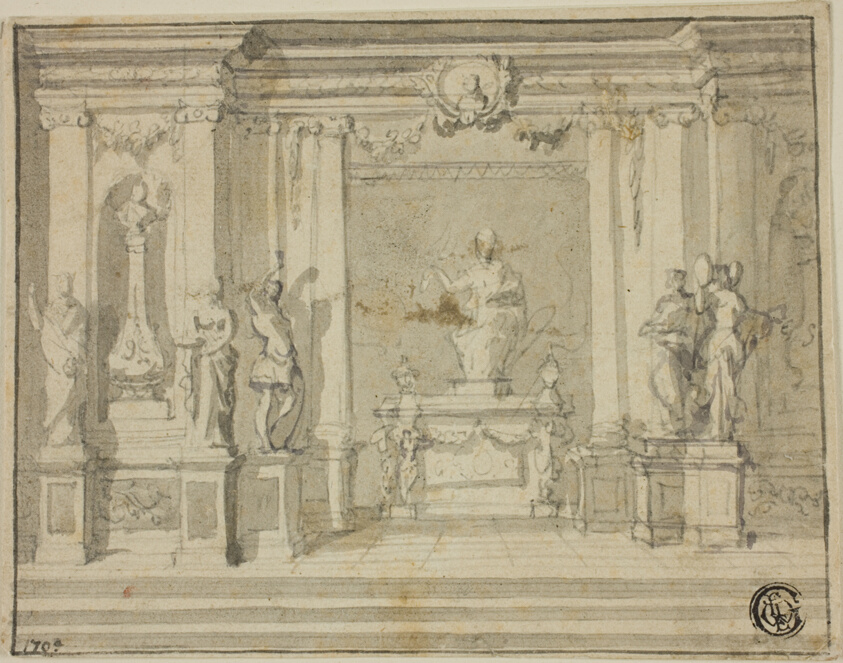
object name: Drawing and Watercolor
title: Inner Portico with Statues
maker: Unknown Artist; British, late 18th century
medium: Graphite and brush and gray wash on ivory laid paper, laid down on ivory laid paper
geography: England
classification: ink or chalk wash; drawings (visual works); prints and drawing